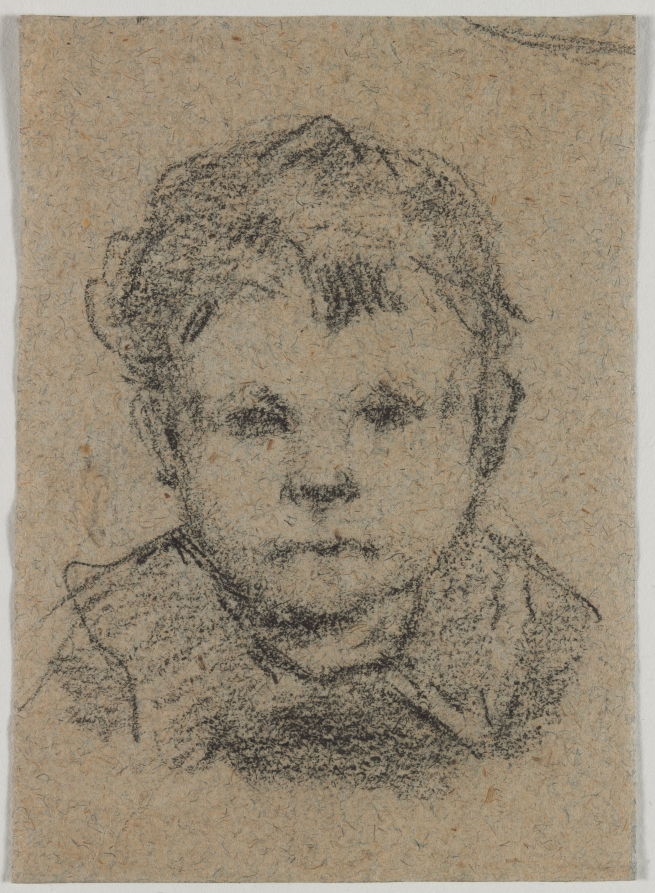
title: Emil Gauguin as a Child, Wearing a Collared Shirt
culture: France, 19th century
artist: Paul Gauguin (French, 1848–1903)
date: c. 1875–1876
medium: black crayon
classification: Drawing